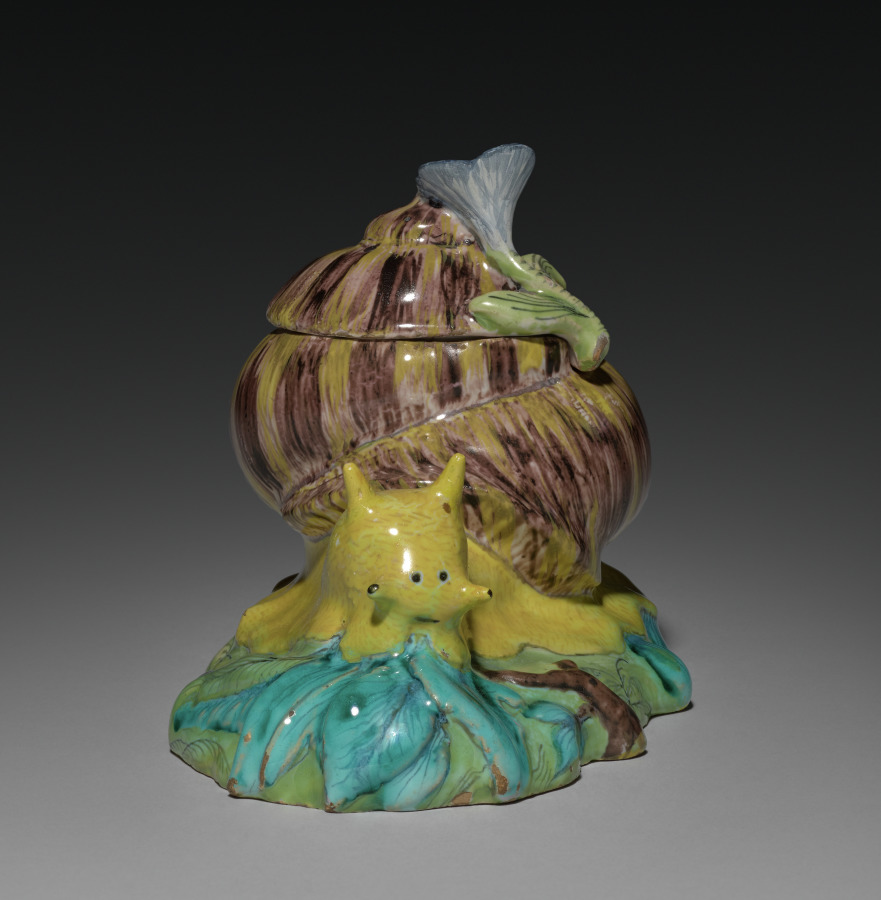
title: Covered Box in the Form of a Snail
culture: France, 18th century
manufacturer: Strasbourg Factory (France)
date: c. 1750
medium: faience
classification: Ceramic